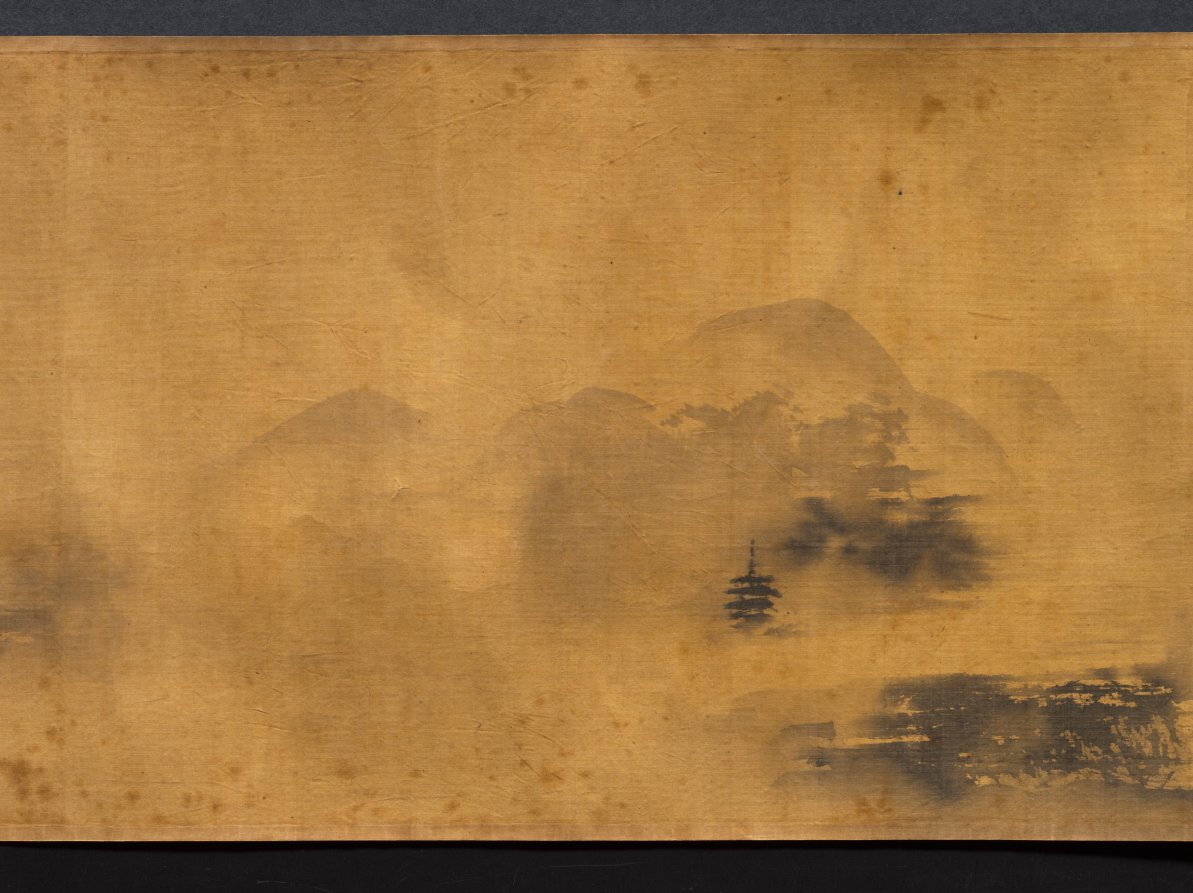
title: Eight Views of Xiao-Xiang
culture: Japan, Edo period (1615–1868)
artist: Kano Tan’yū (Japanese, 1602–1674)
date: 1615–1868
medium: handscroll; ink on silk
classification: Painting